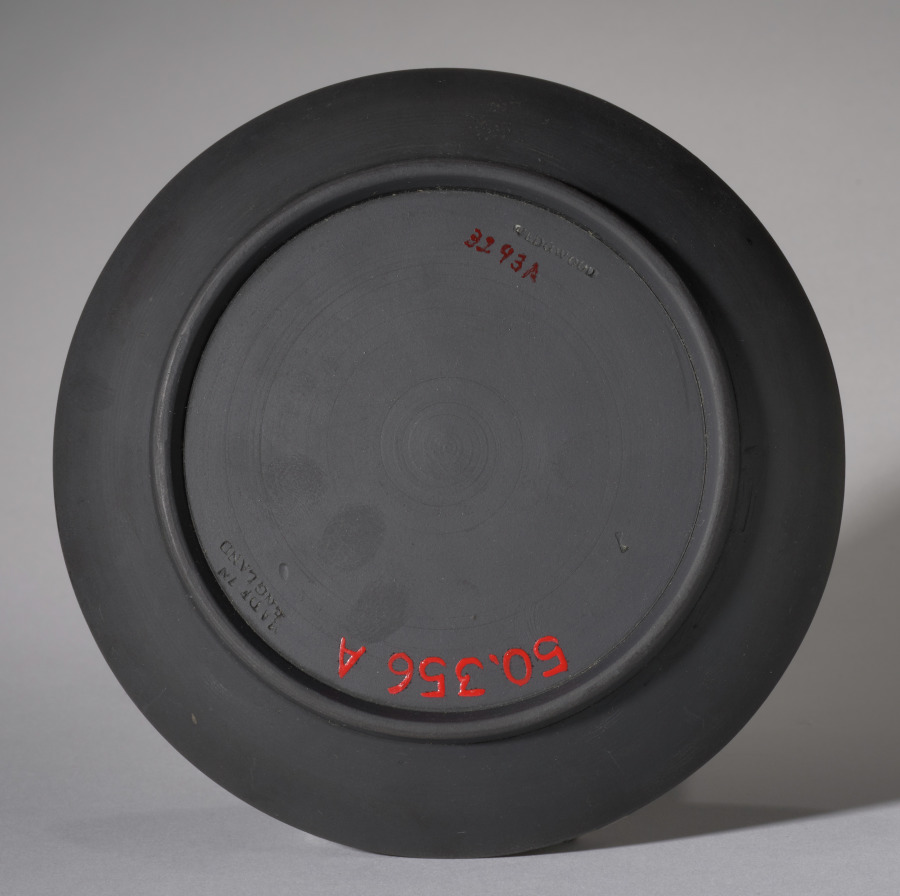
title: Saucer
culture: England, Staffordshire, 19th century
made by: Wedgwood Factory (British)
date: 1800s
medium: black basalt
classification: Ceramic